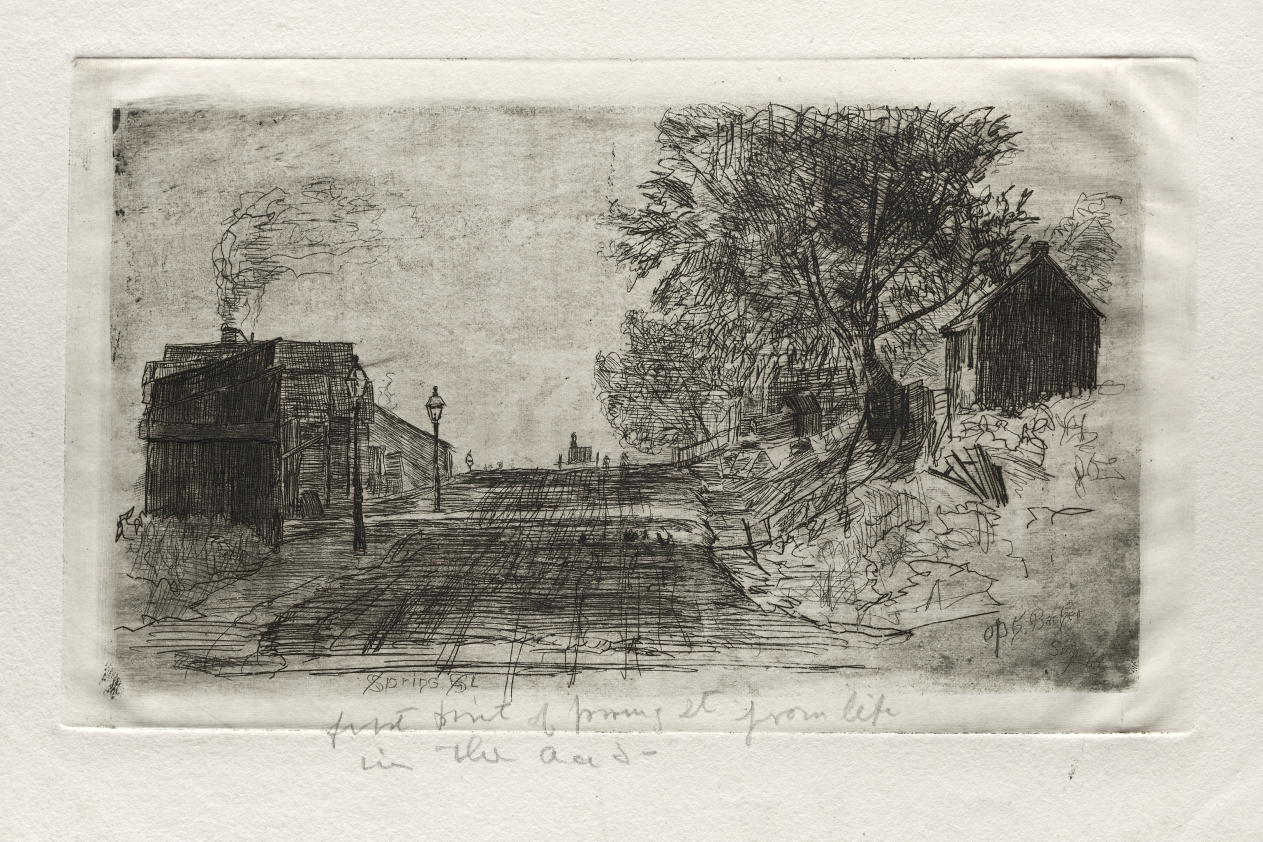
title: Spring Street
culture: America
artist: Otto H. Bacher (American, 1856–1909)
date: 1878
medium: etching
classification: Print